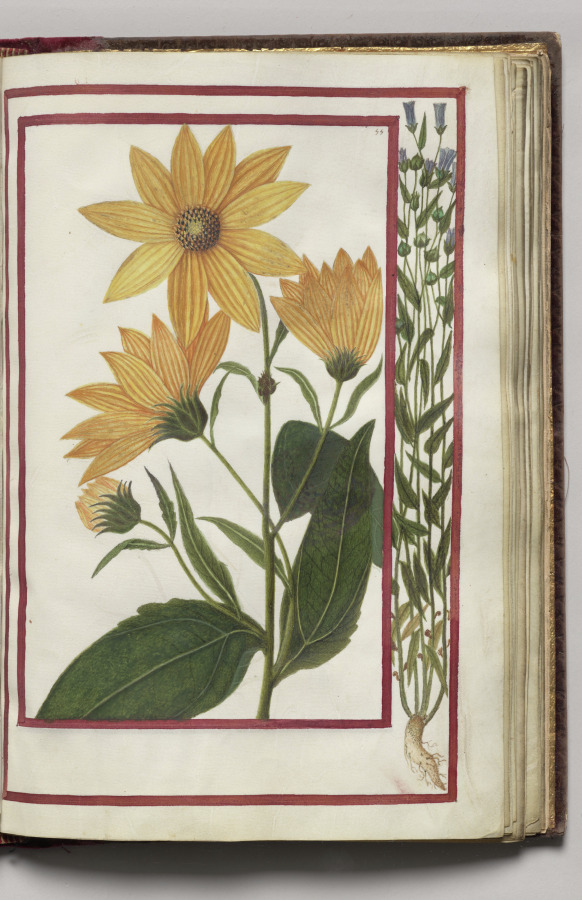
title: Helianthus with Blue Flower Border, folio 28 (recto), from Florilegium (A Book of Flower Studies)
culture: France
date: 1608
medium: watercolor, ink, silver, and gold over occasional traces of pencil, on vellum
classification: Bound Volume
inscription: Dated: Poitiers 1608 (on frontispiece) Signed: On frontispiece in black ink, lower right: Van Kuyk Notation on drawing: Frontispiece: in pencil, lower margin: * élève de Van Kessel, peintre flammand (* in pencil also appears in front of Van Kuyk's name).